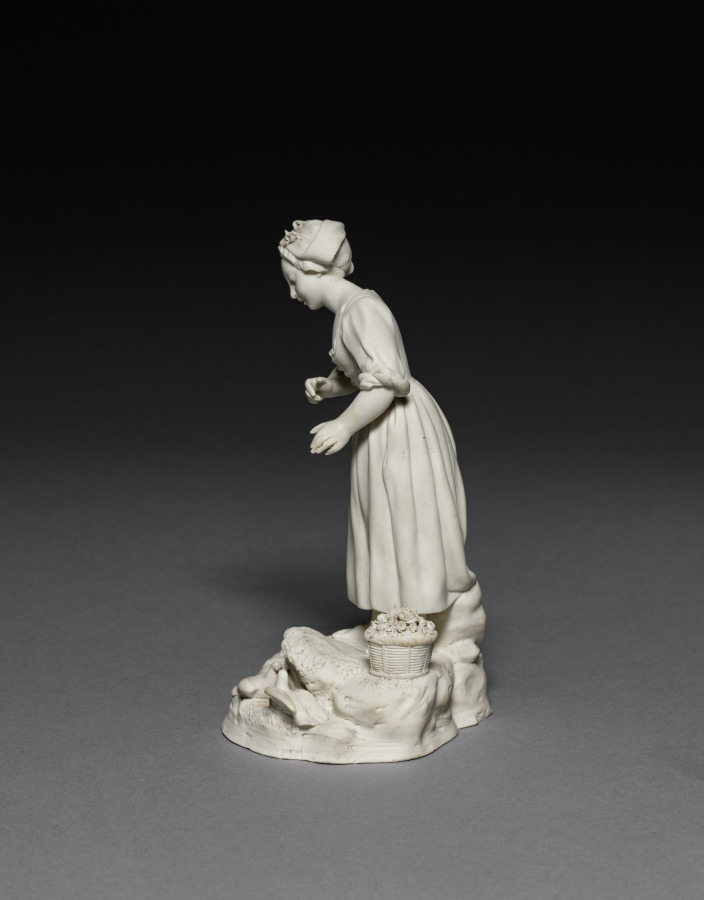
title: Curiosity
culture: France, Lunéville, 18th century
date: c. 1770–1775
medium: pipe clay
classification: Ceramic